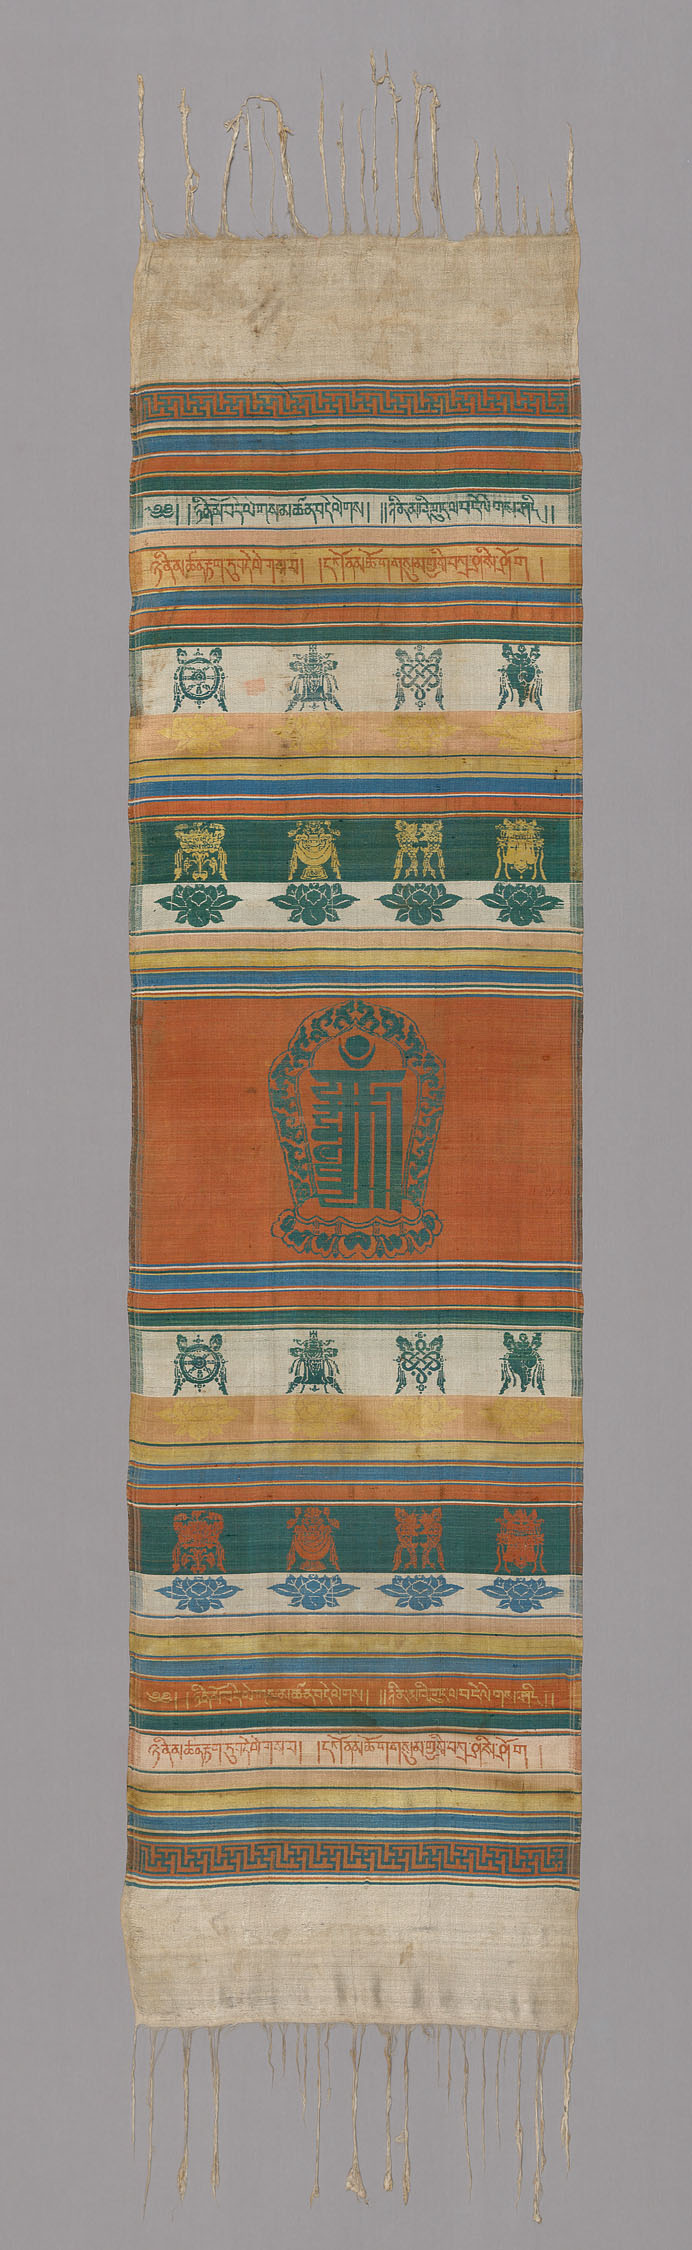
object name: Religious/Ritual Object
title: Ceremonial Shawl (Kata)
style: ming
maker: China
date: Ming dynasty (1368–1644), 15th/16th century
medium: silk, bands of satin weave and bands of satin weave with supplementary patterning wefts bound in satin interlacings; fringe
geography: China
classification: textile; weaving; ritual objects